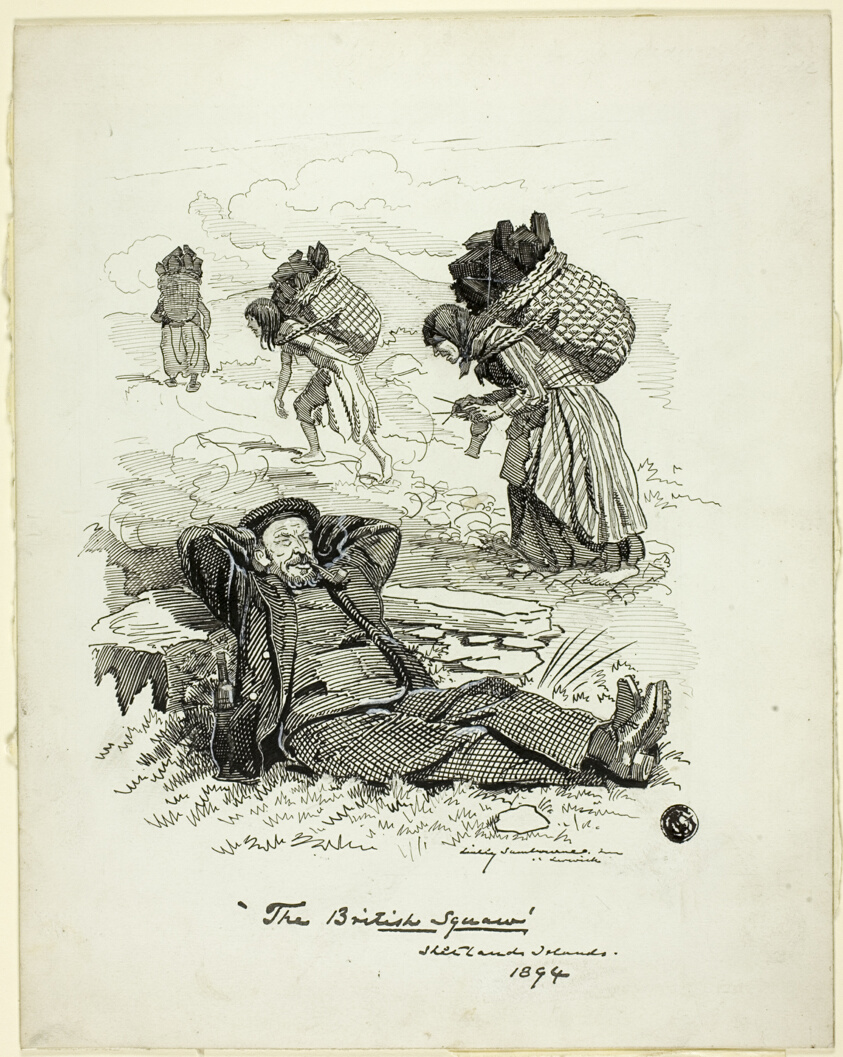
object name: Drawing and Watercolor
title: The British Squaw, Shetland Islands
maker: Linley Sambourne; English, 1845-1910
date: 1894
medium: Pen and black ink heightened with white gouache, on ivory wove card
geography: England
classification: pen and ink drawings; drawings (visual works); prints and drawing